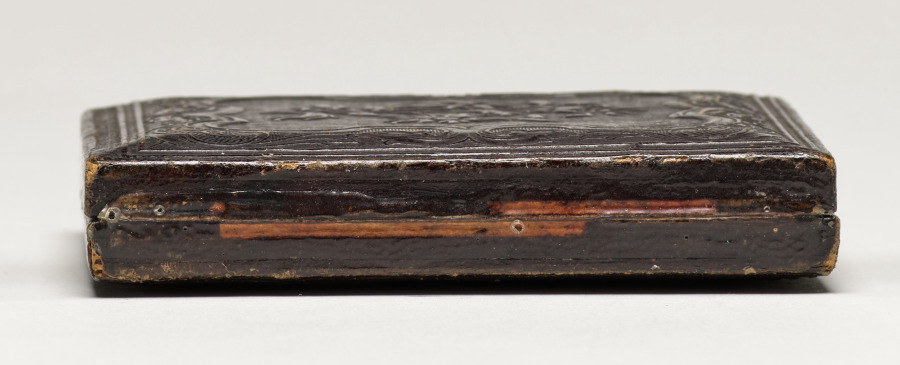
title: Boy with Cigar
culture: America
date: c. 1855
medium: daguerreotype, tinted, sixth plate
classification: Photograph